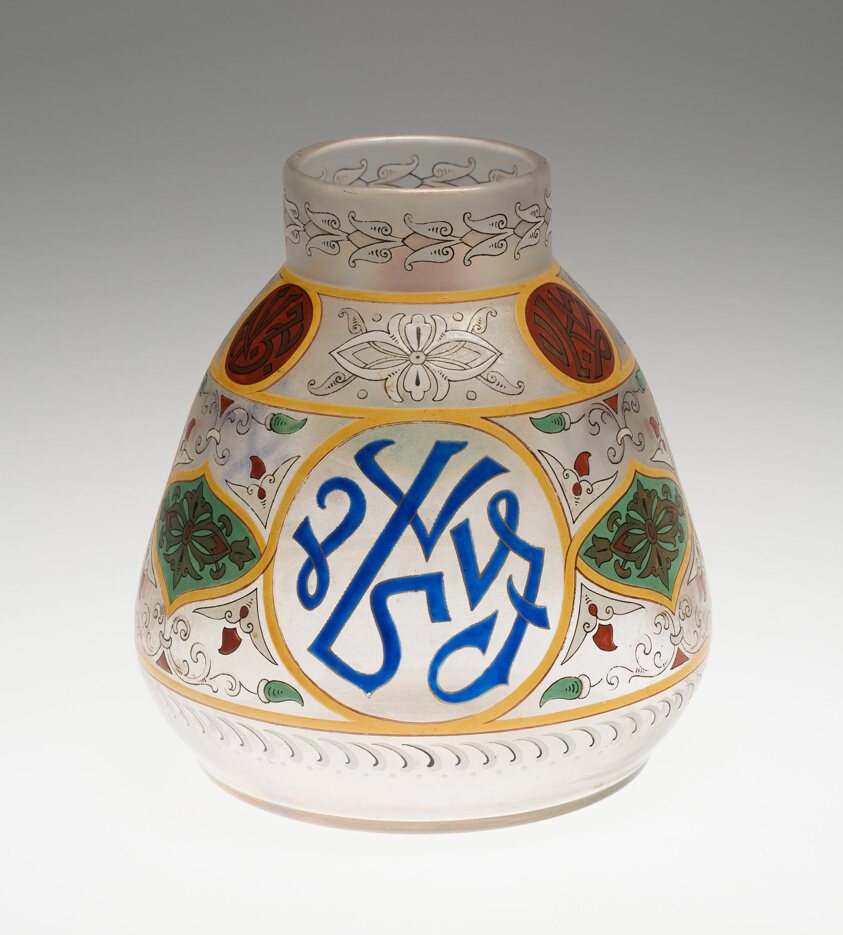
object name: Glass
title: Vase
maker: Fritz Heckert Glass Refinery and Glassworks; Petersdorf, Silesia (now Poland), 1866-1923; Possibly designed by Otto Thamm; German, 1860-c. 1905; Possibly decorated by Adolph Heyden; German, 1838-1902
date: c. 1900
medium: Glass with enamel decoration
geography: Silesia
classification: vase; vessel; glass; european decorative arts